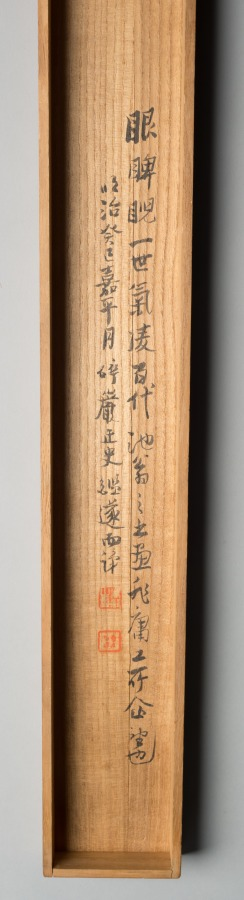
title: Illustration of Zhang Qi's Poem on the Cold Mountain Temple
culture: Japan, Edo period (1615–1868)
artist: Ike Taiga (Japanese, 1723–1776)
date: mid- to late 1700s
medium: hanging scroll; ink and color on paper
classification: Painting